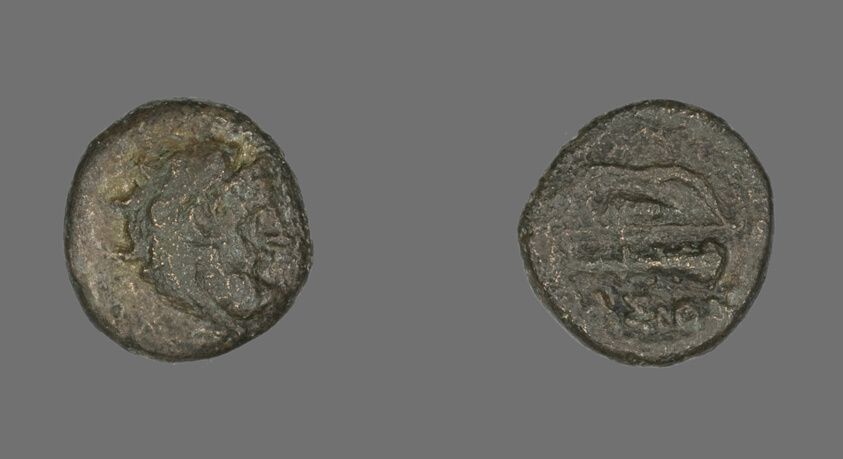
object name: Coin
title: Coin Depicting the Hero Herakles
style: greek, ancient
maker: Greek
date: about 280 BCE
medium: Bronze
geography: Ancient Greece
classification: coin; ancient art